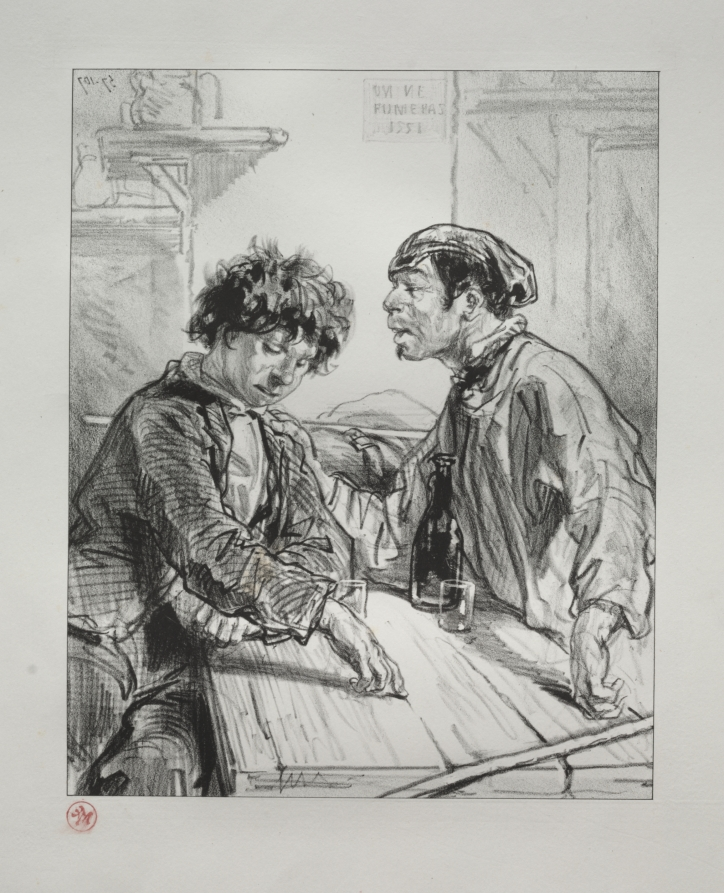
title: Young man, you have capital, but no experience. That doesn't matter, you interest me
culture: France, 19th century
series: Par-ci, par-lá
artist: Paul Gavarni (French, 1804–1866)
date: c. 1857–58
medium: lithograph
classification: Print